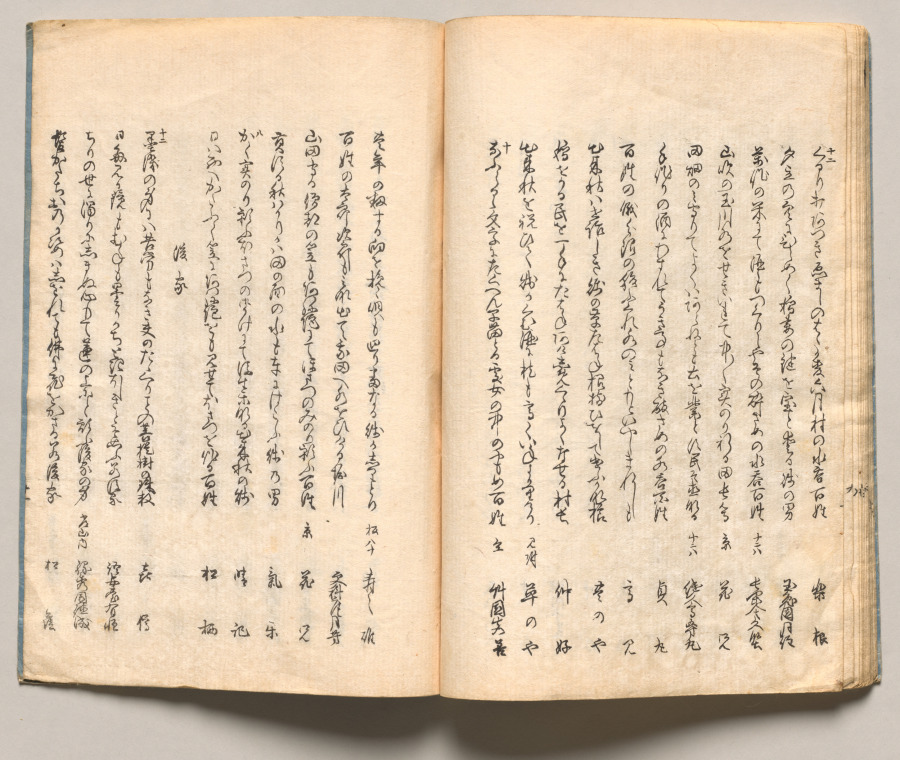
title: Spread Nineteen from Volume One of People of Japan in Light Verse (Kyōka)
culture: Japan, Edo period (1615–1868)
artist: Utagawa Hiroshige (Japanese, 1797–1858)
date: 1857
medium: Woodblock-printed book; ink and color on paper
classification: Bound Volume